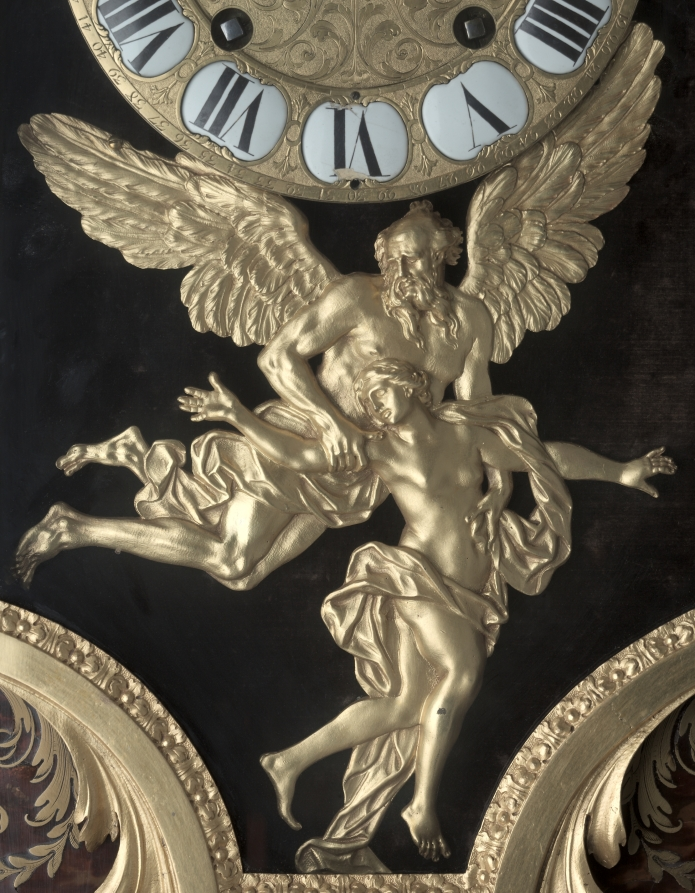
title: Clock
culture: France, late 17th Century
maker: André-Charles Boulle (French, 1642–1732)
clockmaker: Balthazar Martinot II (French, 1636–1714)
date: c. 1695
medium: tortoise shell and brass inlay, gilt bronze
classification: Furniture and woodwork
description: Appointed cabinetmaker to King Louis XIV in 1672, André-Charles Boulle became a master of furniture making in France during the late 1600s until his death in 1732. Known primarily for his use of marquetry, in which metal patterns are inlaid into tortoiseshell then applied within the veneered surface of the furniture, Boulle established a level of quality and craftsmanship few others could achieve. As a result, his work found favor at the royal court and among other aristocrats and diplomats eager to impress the king. Often exhibiting stout architectural proportions with elegant groups of inlaid motifs, Boulle’s designs are an example of the intellectual fashion for contrasting ideas, materials, and motifs. With its relatively new scientific invention of a pendulum mechanism and the addition of a barometer, the mantel clock represented the wealth, prestige, and intellect of its owner.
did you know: The Latin phrase inscribed on this clock, Dirigit atque movet, can be translated as "time constantly moves on."